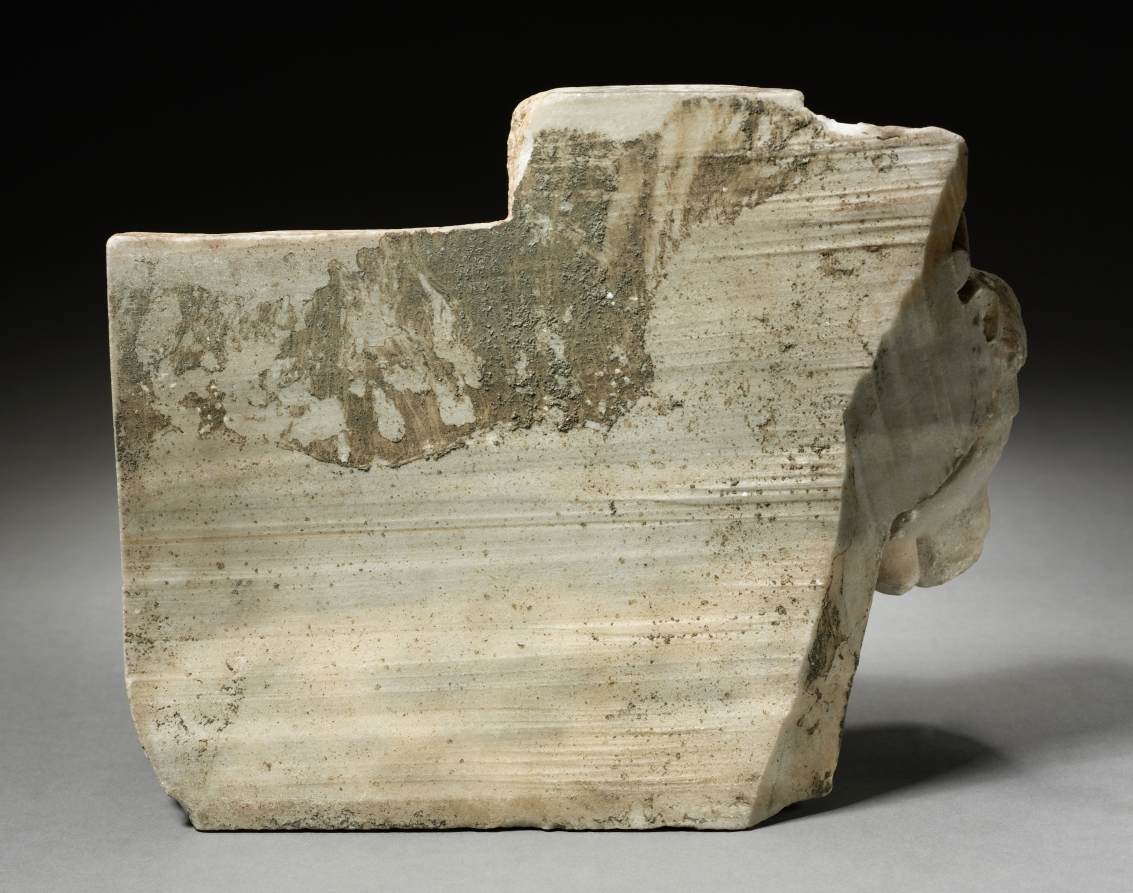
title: Fragment of a Capital with the Ox of Saint Luke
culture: Northern Italy, Emilia (Bologna?), 12th century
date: c. 1175–1200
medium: marble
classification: Sculpture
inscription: above the profile ox: S. LU.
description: This fragment and two other capitals (1972.20 and 1972.21) were once parts of the same structure. Though the original structure is unknown, their style suggests that it was located in Bologna. As the fragmentary Latin inscription S: LU suggests, the ox represents the traditional symbol in medieval art of the Evangelist Saint Luke.